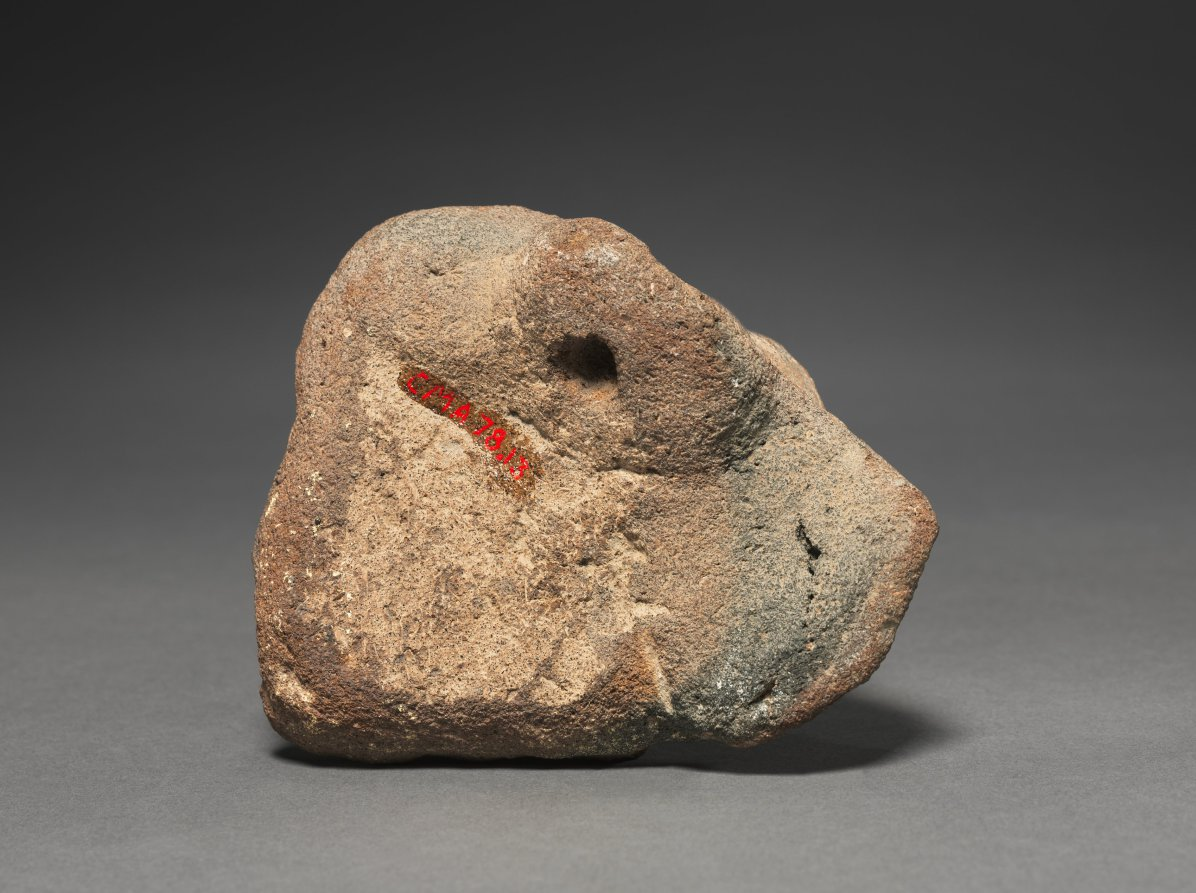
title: Yakshini's Head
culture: Java, Eastern Javanese Period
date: c. 11th Century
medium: terracotta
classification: Sculpture